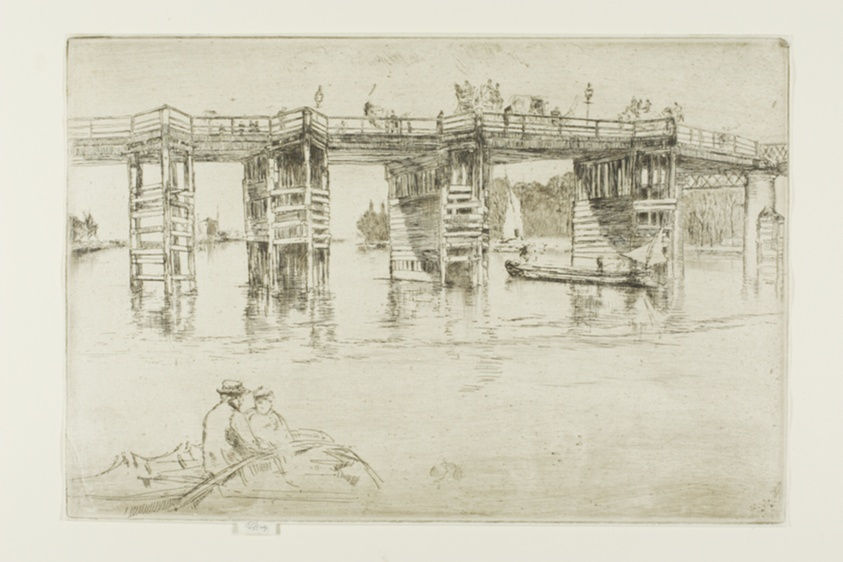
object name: Print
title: Old Putney Bridge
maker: James McNeill Whistler (American, 1834-1903)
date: 1879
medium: Etching and drypoint with foul biting in dark brown ink on ivory laid paper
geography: United States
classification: etching; drypoint; print; prints and drawing; foul biting; paper